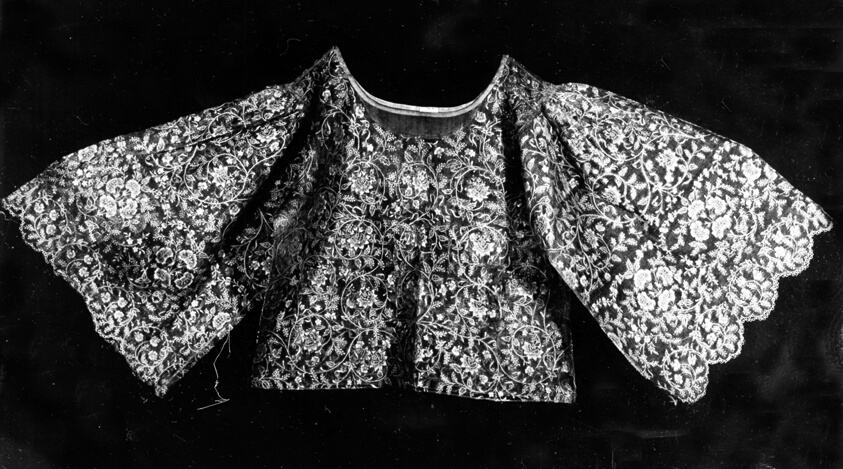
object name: Costume and Accessories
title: Blouse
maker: Philippines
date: 19th century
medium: Drawnwork on pineapple cloth; embroidered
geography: Philippines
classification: textile; costume; dress (garment); clothing